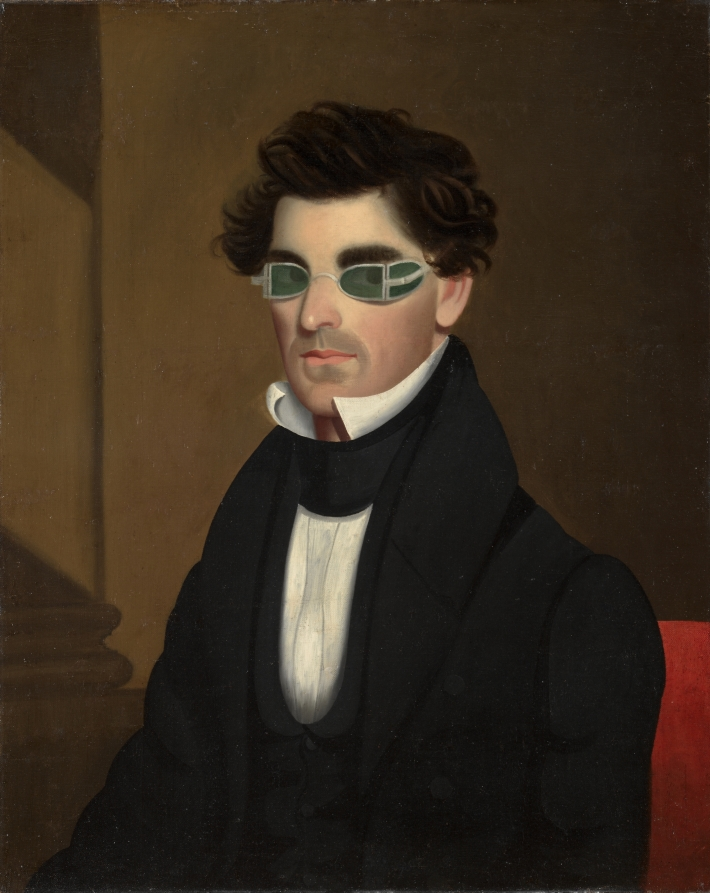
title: Nathaniel Olds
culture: America, Ohio, Cleveland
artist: Jeptha Homer Wade (American, 1811–1890)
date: 1837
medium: oil on canvas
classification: Painting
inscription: signed on back: J.H. WADE / 6-37-15 / Farmer Valley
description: Nathaniel Olds’s glasses have four tinted lenses, two of which are hinged side shields. This style was typically worn to protect sensitive eyes from excessive light, dust, or wind. Due to their occasional use during open-air travel, they were sometimes referred to as carriage or railroad spectacles. The painter of this portrait founded the Western Union Telegraph Company in 1854 and soon became one of Cleveland’s wealthiest industrialists. His grandson, Jeptha Wade II, was a founder of the Cleveland Museum of Art and donated the land upon which it stands as a Christmas gift to the city in 1892.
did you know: This painting has a distinguished history inspiring Halloween costumes in the Cleveland area.